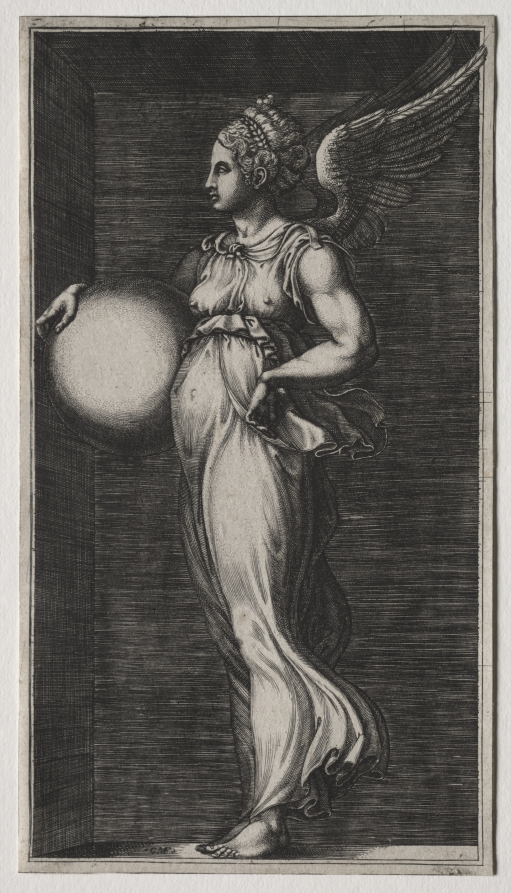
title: Allegorical Figure Holding a Sphere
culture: Italy, 16th century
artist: Giorgio Ghisi (Italian, 1520–1582)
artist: possibly after Giulio Romano (Italian, 1492/99–1546)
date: mid 1560s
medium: engraving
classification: Print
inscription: lower left, in plate: GMF ; VERSO, lower left, in graphite: B 15 34 ; lower center, in graphite: H1600 ; lower right, in graphite: MKH ; lower right, verso, in graphite: [illegible] ; lower right, in pen and brown ink: [illegible]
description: Giorgio Ghisi (Italian, 1520/21-1582) Allegorical Figure Holding a Sphere (after Giulio Romano?), mid-1560s Engraving Dudley P. Allen Fund 1972.149 Scholars disagree about the identity of this allegorical personification. She has been variously described as Victory, Fortune, Temperance, and the Primum Mobile (Prime Mover), believed to be a force that generated celestial motion.